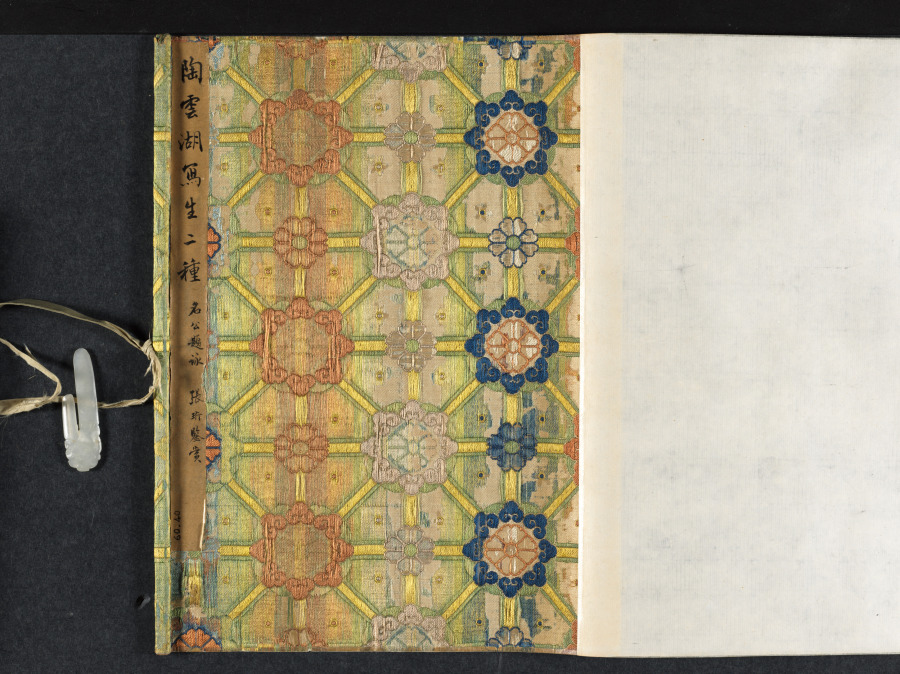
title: Chrysanthemums and Cabbage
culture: China, Ming dynasty (1368–1644)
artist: Tao Cheng (Chinese, active c. 1471–after 1502)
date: c. 1486 or before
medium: handscroll, ink and slight color on paper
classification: Painting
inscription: Artist's seal at beginning of painting: Yun hu 雲湖. Title by Wang Wenzhi 王文治 (1730–1802), date 1756. 2 seals of Wang Wenzhi 王文治 (1730-1802); 3 seals of Ku Yün (n. d.)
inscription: Section A (Chrysanthemums): 1 poem and 1 seal of Zhang Yuanzhen 張元禎 (1437–1507) - Jinshi, 1461; 1 poems and 3 seals of Ni Yue 倪岳 (1444–1501) - Jinshi, 1464; 1 poems and 2 seals of Zhao Xiang 趙祥 (life dates unknown) - Jinshi, 1469; 1 poems and 1 seals of Wu Xixian 吳希賢 (1437–1489) - Jinshi, 1464; 1 poems and 1 seals of Lü Chang 呂㦂 (1449–1511) - Juren, 1471; 1 poems and 3 seals of Fu Han 傅瀚 (1435–1502) - Jinshi, 1464; 1 poems and 1 seals of Feng Jue 馮珏 (life dates unknown) - Jinshi, 1478.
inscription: Chrysanthemums section, poem 1, by Zhang Yuanzhen 張元禎 (1437–1507): Several bushes of chrysanthemums grow in front of the Five-Willow Cottage,/ The yellow ones are really yellow and the white ones white./ This affable and decent fellow, young in years and unsophisticated,/ Has snapped one of the branches to dip in ink. (The Five-Willows Cottage was the home of the poet Tao Qian 陶潛 (Tao Yuanming 陶淵明, AD 365-427).) Chrysanthemums section, poem 2, by Ni Yue 倪岳 (1444–1501): Where at the Eastern Fence can you grieve for the Soul of the Xiang River?/ A man of upright character is mourned within the traces of ink./ White jade with a slight flaw would be a grievance forever,/ Later men should understand why even the roots of the flowers are washed. (Eastern Fence refers again to the poet Tao Qian 陶潛, while the Soul of the Hsiang River refers to the poet Qu Yuan 屈原 (c. 340–278 BC).) Chrysanthemums section, poem 3, by Zhao Xiang 趙祥 (life dates unknown): A clump of chrysanthemum grows in front of the bamboo pavilion,/ The winds of many autumns have blown since we parted beyond the river./ Straining wine through the official's cap of Tao [Qian] to prolong autumn's pleasures,/ The mists and clouds of ten thousand miles belong to the intoxicated. Chrysanthemums section, poem 4, by Wu Xixian 吳希賢 (1437–1489): It is a different spring if mulberry is planted during the latter part of the year,/ The dust of the world originally did not drop on clothing./ Who spills out ink under the Eastern Fence/ And paints so freely this portrait of chrysanthemums for the venerable Sir Tao? Chrysanthemums section, poem 5, by Lü Chang 呂㦂 (1449–1511): This full tray of ink for painting [flowers] at the Eastern Fence;/ Their whiteness or yellowness is not essential in capturing their beauty./ I don't have to go to Jiangnan to see them myself./ At my old house grow two or three branches. Chrysanthemums section, poem 6, by Fu Han 傅瀚 (1435–1502): Who daubed autumn flowers with ink/ As if they were dark dew on a branch tip only vaguely seen at evening?/ After the lazy clouds disperse, no one paints;/ A certain unconventionality pervades this painting. Chrysanthemums section, poem 7, by Feng Jue 馮珏 (life dates unknown): To satisfy his hunger, [the chrysanthemums] have at times entered the poetry of Qu Yuan;/ Taking up the wine cup, it felt close to Tao Qian./ [With them I am like] a lonely root sustained by deep water/ Or an old man to whose hair the color of youth returns.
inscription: Section B (Cabbage): 1 poem and 1 seal of Cai Qi 蔡圻 (life dates unknown) - degree information not known; 1 poems and 3 seals of Ni Yue 倪岳 (1444–1501) - Jinshi, 1464; 1 poem and 3 seals of Jiao Fang 焦芳 (1436–1517) - Jinshi, 1464; 1 poem and 3 seals of Li Dongyang 李東陽 (1447–1516) - Jinshi, 1464; 1 poems and 1 seals of Wu Xixian, signed “Xixian” 吳希賢 - Jinshi, 1464; 1 poems and 3 seals of Fu Han 傅瀚 (1435–1502) - Jinshi, 1464; 1 poems and 1 seals of Lü Chang 呂㦂 (1449–1511) - Juren, 1471; 1 poems and 2 seals of Zhao Xiang 趙祥 (life dates unknown) - Jinshi, 1469; 1 poems and 1 seals of Feng Jue 馮珏 (life dates unknown) - Jinshi, 1478.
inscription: Cabbage section, poem 1, by Cai Qi 蔡圻 (life dates unknown): The ink splashes are fresh from a frosty brush dipped in pond water;/ I can visualize that time when Yunhu 雲湖 [Tao Cheng] first showed his talents./ I lament the places where I scribbled before,/ Who would open them to inscribe a poem? (The first line is an allusion to the famous Jin dynasty calligrapher Wang Xizhi 王羲之 (AD 303-361), who practiced calligraphy so diligently at the edge of a pond that the water turned black with ink.) Cabbage section, poem 2, by Ni Yue 倪岳 (1444–1501): After rain the vegetables begin to grow;/ How are the colors of the masses lately!/ Once you get used to them, the tastiest parts are the ends of the roots;/ I don't know if they can be used for "seasoning soup." ("Seasoning soup" is an allusion to the statesmanship of a chief minister.) Cabbage section, poem 3, by Jiao Fang 焦芳 (1436–1517): This crop of purple stalks and green leaves is late and irregular;/ Now the rainy season is over for the Eastern Garden./ All the nobles nowadays dine on meat;/ Who of them knows the flavor of this [cabbage]. Cabbage section, poem 4, by Li Dongyang 李東陽 (1447–1516): It's always helped the honest man to sober up after drinks./ I intend to go to the deepest part of the stream-crossed garden/ To refresh myself in the fragrance and dew of evening. Cabbage section, poem 5, by Wu Xixian 吳希賢 (1437–1489): After rain, the white silk is filled with fragrant vegetables;/ How many times this happens in Mr. Tao's paintings./ On whom will you depend to present a memorial to the ruler?/ Don't let this color emerge on the faces of the people. (The last line is meant as a warning to officials: the color of the vegetables (green) may be pleasing in itself, but when it emerges on the faces of the starving poor, it signifies a badly governed world.) Cabbage section, poem 6, by Fu Han 傅瀚 (1435–1502): For twenty years I have feasted on the excellent mutton of an official;/ Yet I talk and dream about the garden and its vegetables./ Do not merely say it is good to chew the root of the cabbage--/ You must taste to understand what poverty is. Cabbage section, poem 7, by Lu Chang 呂㦂 (1449–1511): The capital is never a place for an apprentice in the "garden of scholarship."/ Who would write about gardens and vegetables on an examination paper?/ I've walked throughout the country in spring;/ Make sure the people don't show this color. Cabbage section, poem 8, by Zhao Xiang 趙祥 (life dates unknown): After a wash of rain, the spring garden is still in order;/ The flavor [of the cabbage] is more suitable with a small drink and the hum of a tune./ The rich and powerful in their mansions consume dish after dish of meat;/ Vegetarian food is known only by the scholars. Cabbage section, poem 9, by Feng Jue 馮珏 (life dates unknown): A new cabbage is nourished with dew;/ It takes a long time to grow and mature./ The business of "seasoning the soup" is your responsibility;/ Better command the gardener to take care [of the cabbages]. trans. HK/LYSL/WKH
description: On an autumn day in Beijing, Tao Cheng had a gathering with a group of scholar-officials and created two paintings in a spontaneous, casual style. The first depicts chrysanthemums, slender bamboo stalks, and a rock in monochrome ink. Tao applied light colors for the second painting that depicts cabbage. Tao deliberately placed the images on the first sections of the paper so that his honorable guests could add their poetic inscriptions inspired by his imagery. In the first section to the right, all seven poetic inscriptions refer to the beloved poet and recluse Tao Qian (also called Tao Yuanming, AD 365–427) who was particularly known for his profound love for chrysanthemum flowers. Most of the inscriptions in the second section express sympathy for the poor, since cabbage is the main ingredient in their humble food. Taken together, the poems and paintings allude to the life and responsibilities of the scholar-official: the importance of both an upright character and a concern for the poor citizens in order to achieve good government.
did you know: Eminent calligrapher Wang Wenzhi 王文治 was only 27 sui when he wrote the title in 1756.